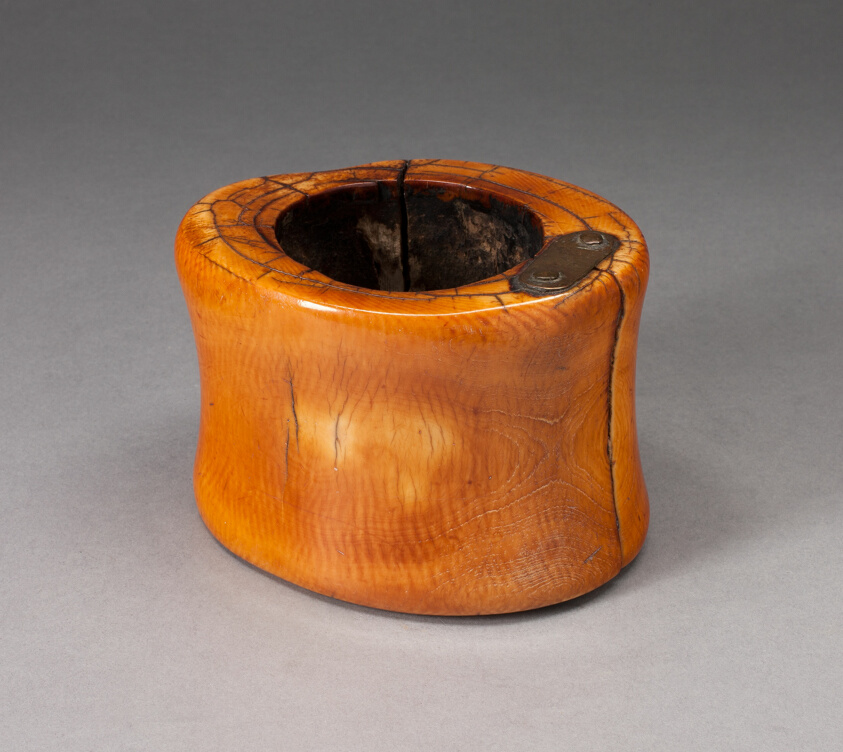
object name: Costume and Accessories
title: Four Bracelets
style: igbo, Arts of Africa, african Art, Coastal West Africa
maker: Igbo; Nigeria; Coastal West Africa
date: Probably 19th century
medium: Ivory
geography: Nigeria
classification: bracelet (jewelry); ivory; jewelry; arts of Africa; african art; costume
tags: costume